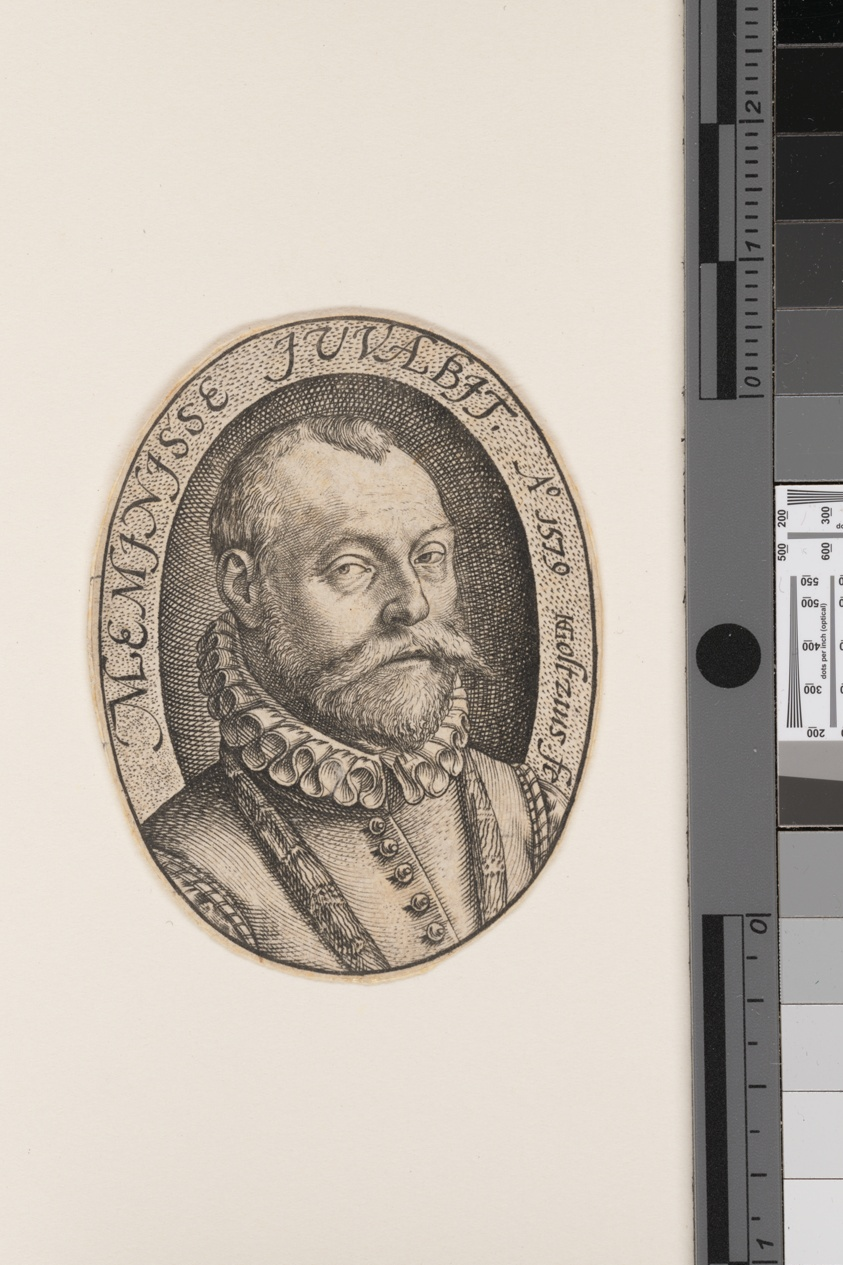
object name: Print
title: Bust of a Man Facing Right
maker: Hendrick Goltzius (Dutch, 1558–1617)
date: 1579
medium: Engraving on paper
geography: Netherlands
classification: engraving; paper; print; prints and drawing